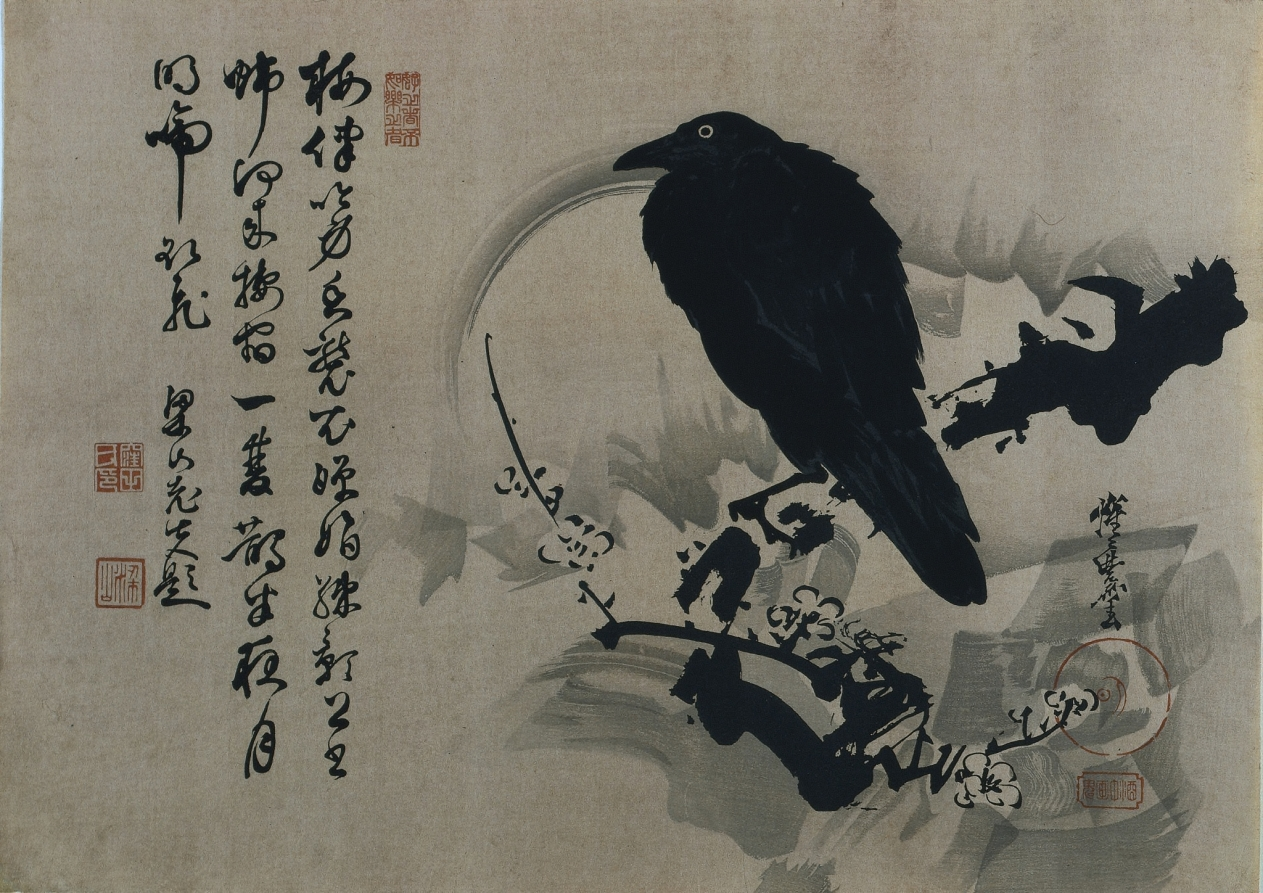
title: Full Moon with Crow on Plum Branch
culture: Japan, Edo period (1615–1868)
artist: Kawanabe Kyōsai (Japanese, 1831–1889)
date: 1880s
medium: color woodblock print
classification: Print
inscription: Signature: Shojo Kyosai ga Artist Seal: Meigetsu (full moon), Shuchu gaki (painting demon in the midst of drink)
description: The accompanying poem may be translated as: The plum accompanies their squawking forms; Its fragrance assaults their feathers. Beautiful shadows of the branches in the moonlight Climb toward the study curtain. The pair of crows that have lodged in my house Cry and make to fly a way, Under the bright moon in the depths of the night.